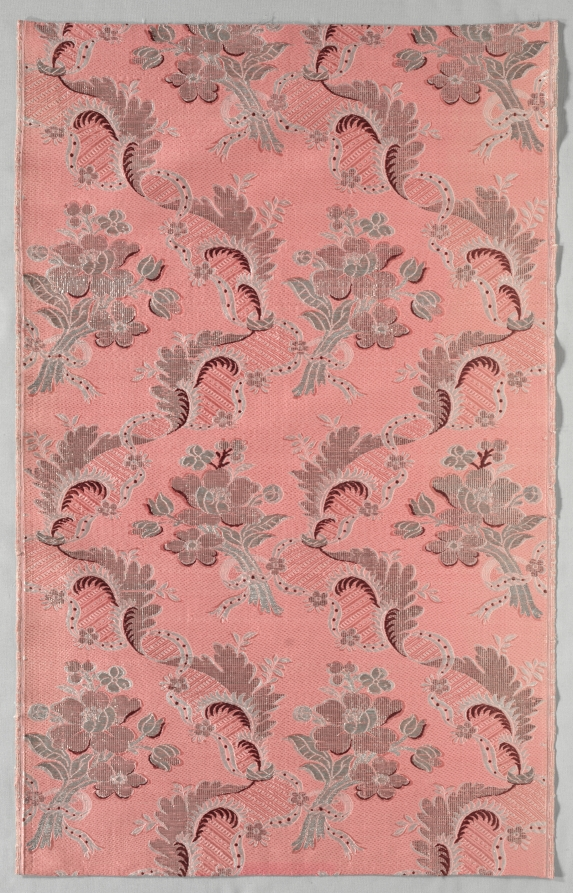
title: Length of Textile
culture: France, 18th century, Period of Louis XV (1723-1774)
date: 1723–1774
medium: brocade; silk and metal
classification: Textile